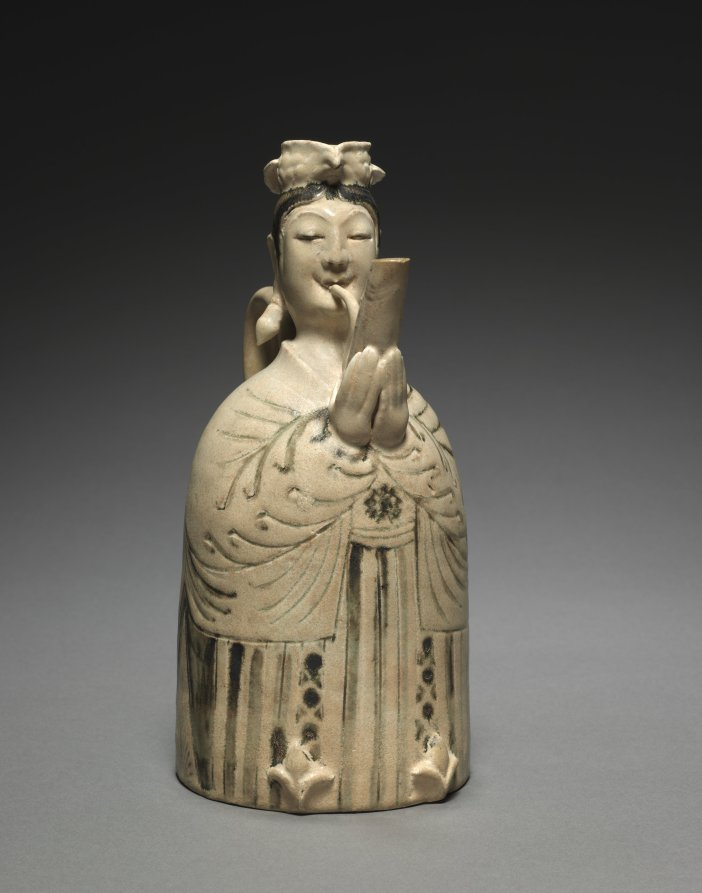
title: Ewer in the form of a Sheng Player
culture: China, Liao dynasty (916-1125)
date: 1000s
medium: glazed, buff stoneware with underglaze slip coating and painting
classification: Ceramic